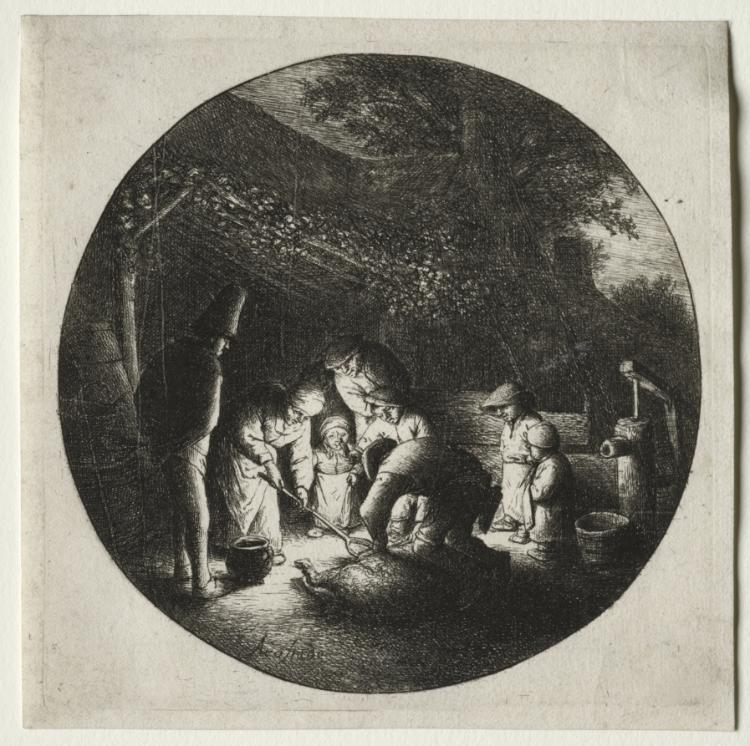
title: The Pigkillers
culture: Netherlands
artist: Adriaen van Ostade (Dutch, 1610–1684)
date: c. 1652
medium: etching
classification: Print